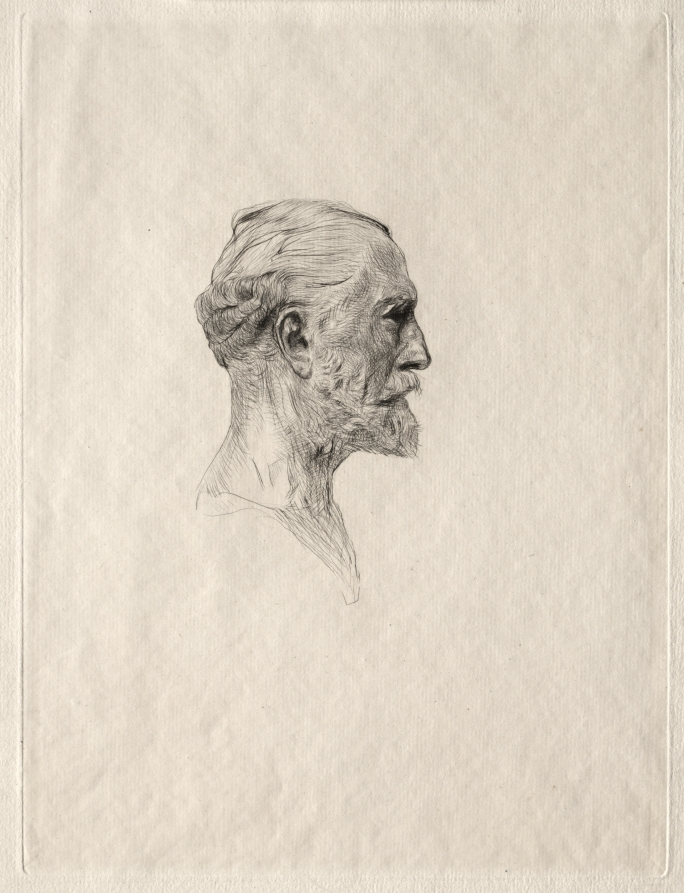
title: Antonin Proust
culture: France, 19th century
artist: Auguste Rodin (French, 1840–1917)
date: 1885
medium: etching and drypoint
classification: Print